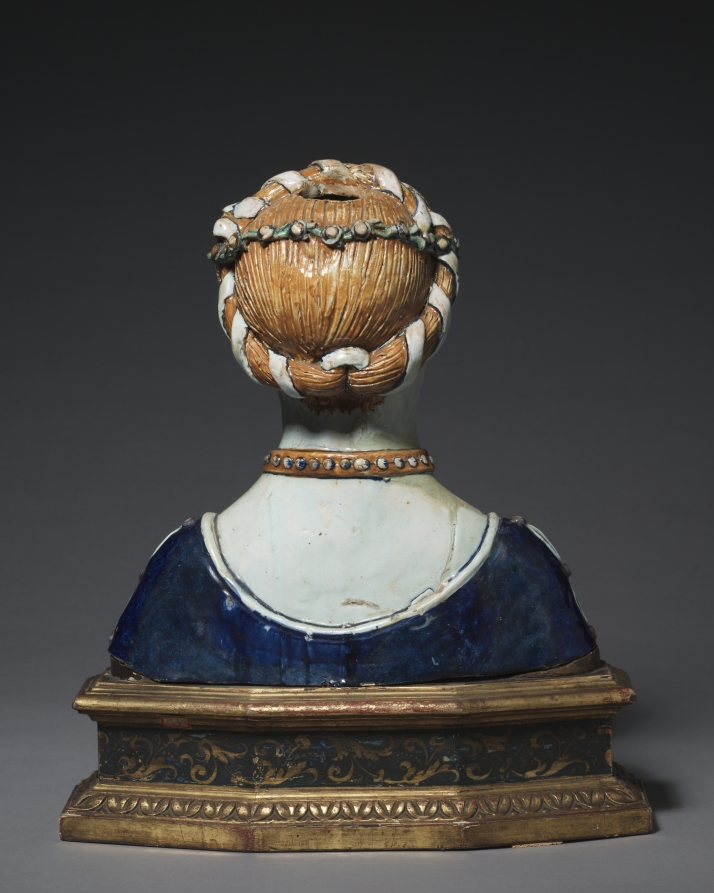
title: Bust of a Woman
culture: Italy, Tuscany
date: early 1500s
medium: tin-glazed earthenware (maiolica)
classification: Sculpture